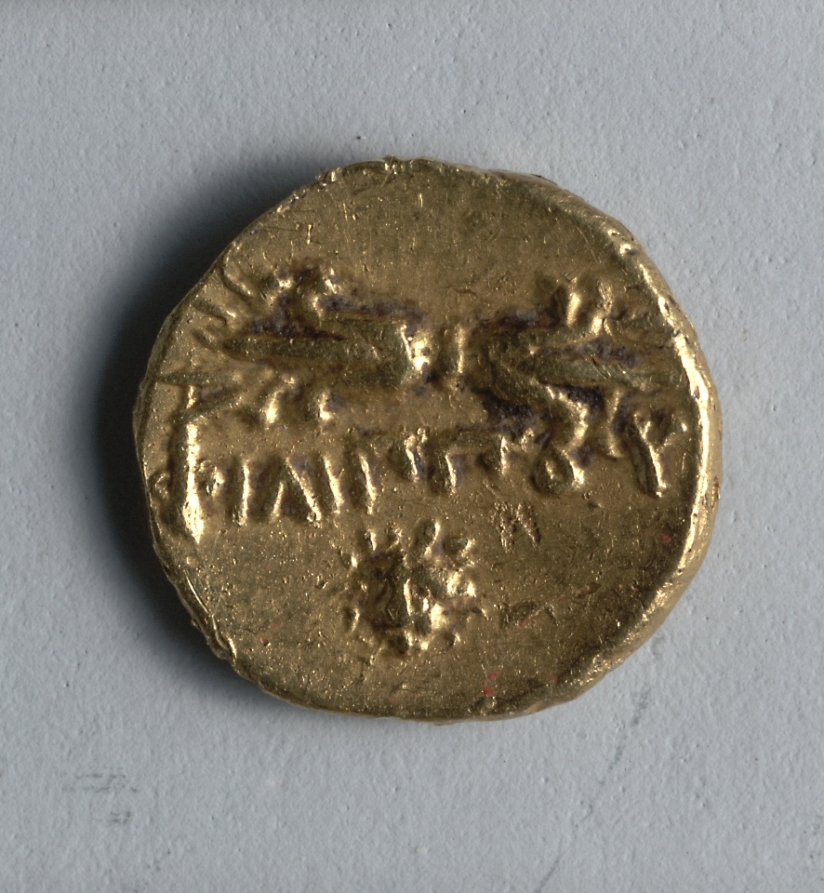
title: Stater: Thunderbolt, Lion Head Facing Below (reverse)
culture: Greek, Macedonian, minted at Pella (Macedonia), reign of Philip II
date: c. 345–336 BCE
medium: gold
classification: Coins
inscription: ΦΙΛΙΠΠΟΥ